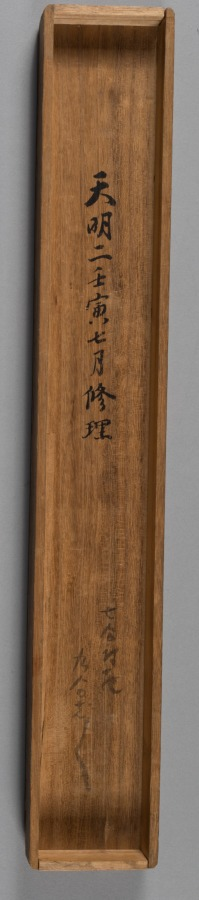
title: Landscape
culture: Japan, possibly Edo period (1615-1868)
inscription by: copy after Ishō Tokugan (Japanese, c. 1359–1437)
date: early 1600s to mid-1800s?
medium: hanging scroll; ink and slight color on paper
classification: Painting